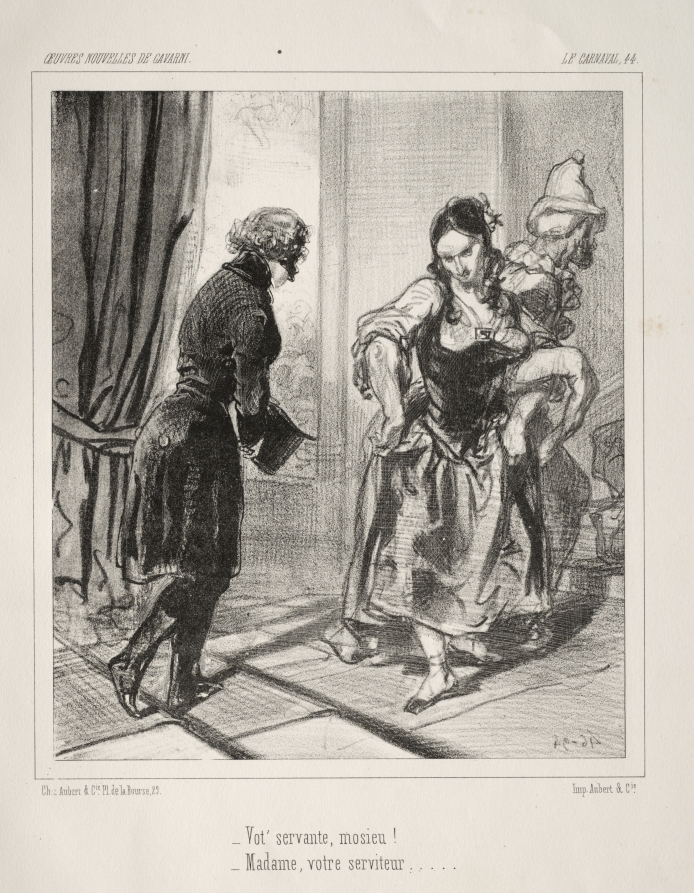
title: Carnaval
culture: France, 19th century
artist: Paul Gavarni (French, 1804–1866)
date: c. 1841–47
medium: lithograph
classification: Print